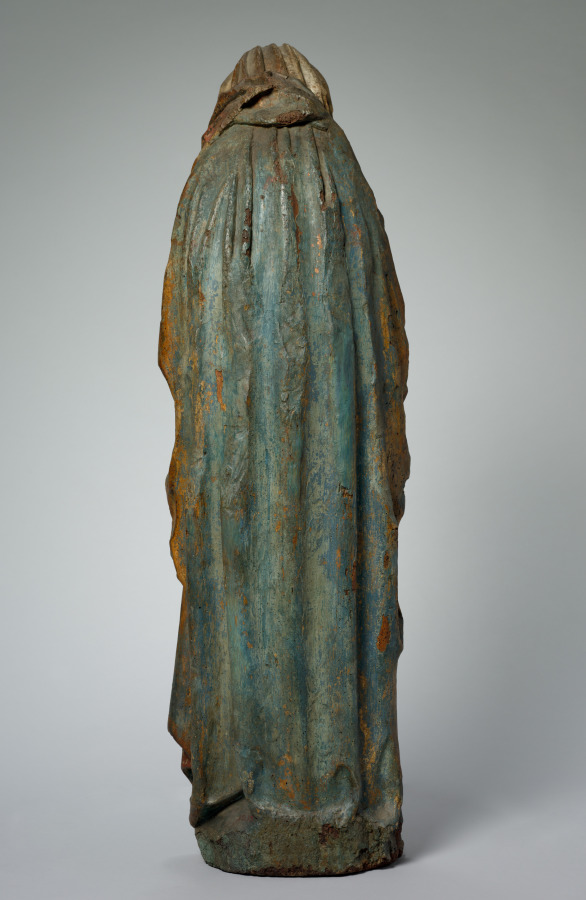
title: Virgin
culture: France, Champagne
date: 1510–15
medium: painted oak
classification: Sculpture